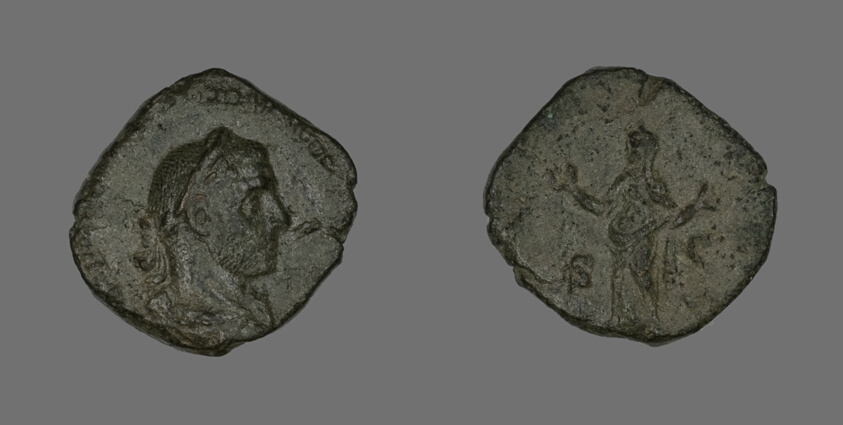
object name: Coin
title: Sestertius (Coin) Portraying Emperor Trebonianus Gallus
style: roman (ancient, style or period)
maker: Roman, minted in Rome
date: 251-253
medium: Bronze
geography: Roman Empire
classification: coin; ancient art